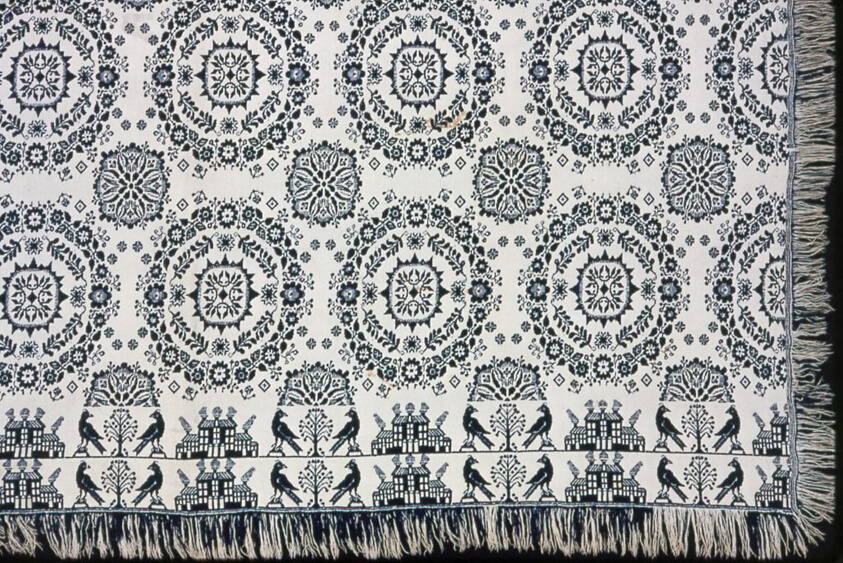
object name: Textile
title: Coverlet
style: 19th century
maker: United States, New York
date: c. 1840/50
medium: Cotton and wool, plain weave double cloth; woven on loom with Jacquard attachment; two loom widths joined; fringed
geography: New York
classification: weaving - coverlet; coverlet; textile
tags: houses, flowers, foliage, medallions, circles, birds, bird, coverlet